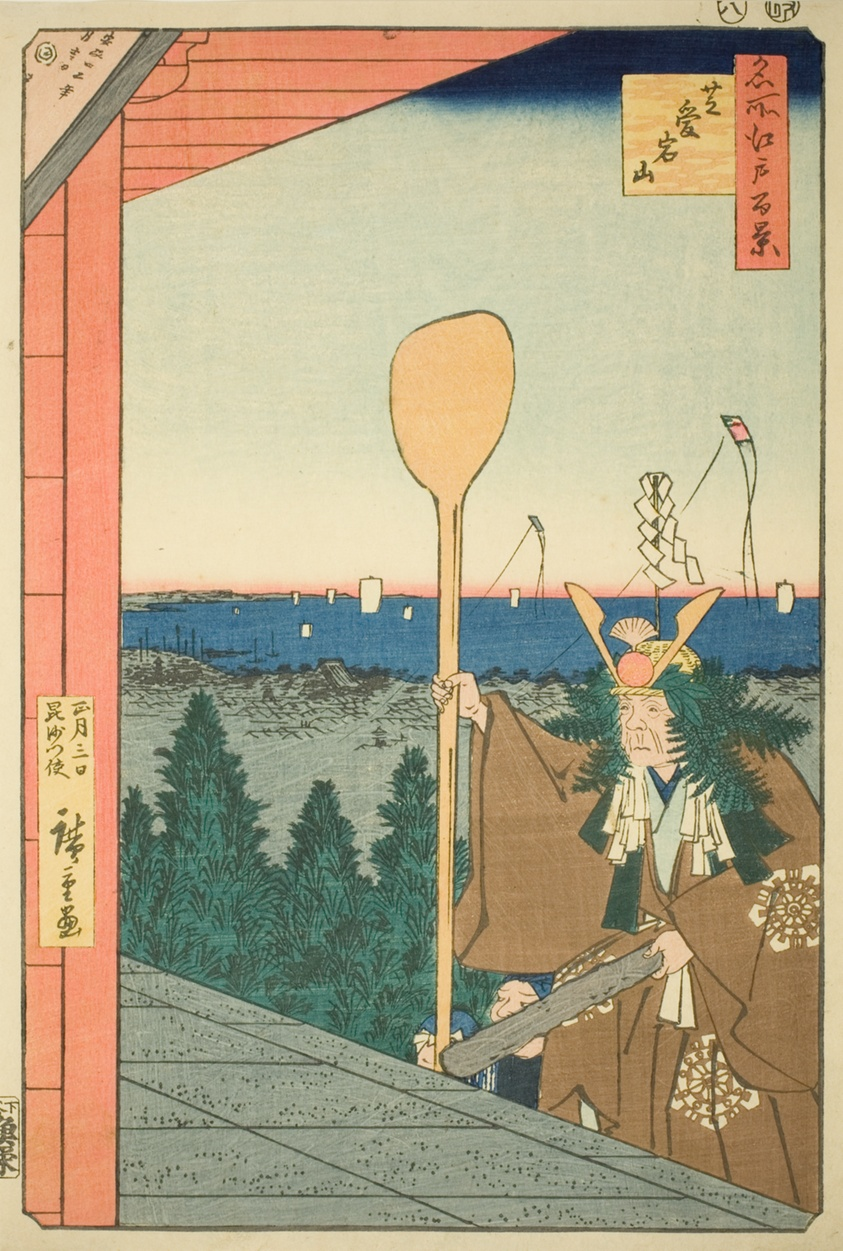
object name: Print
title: Mount Atago, Shiba (Shiba Atagoyama), from the series "One Hundred Famous Views of Edo (Meisho Edo hyakkei)"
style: Japanese (culture or style)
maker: Utagawa Hiroshige 歌川 広重; Japanese, 1797-1858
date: 1857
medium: Color woodblock print; oban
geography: Japan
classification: woodblock print; print; asian art